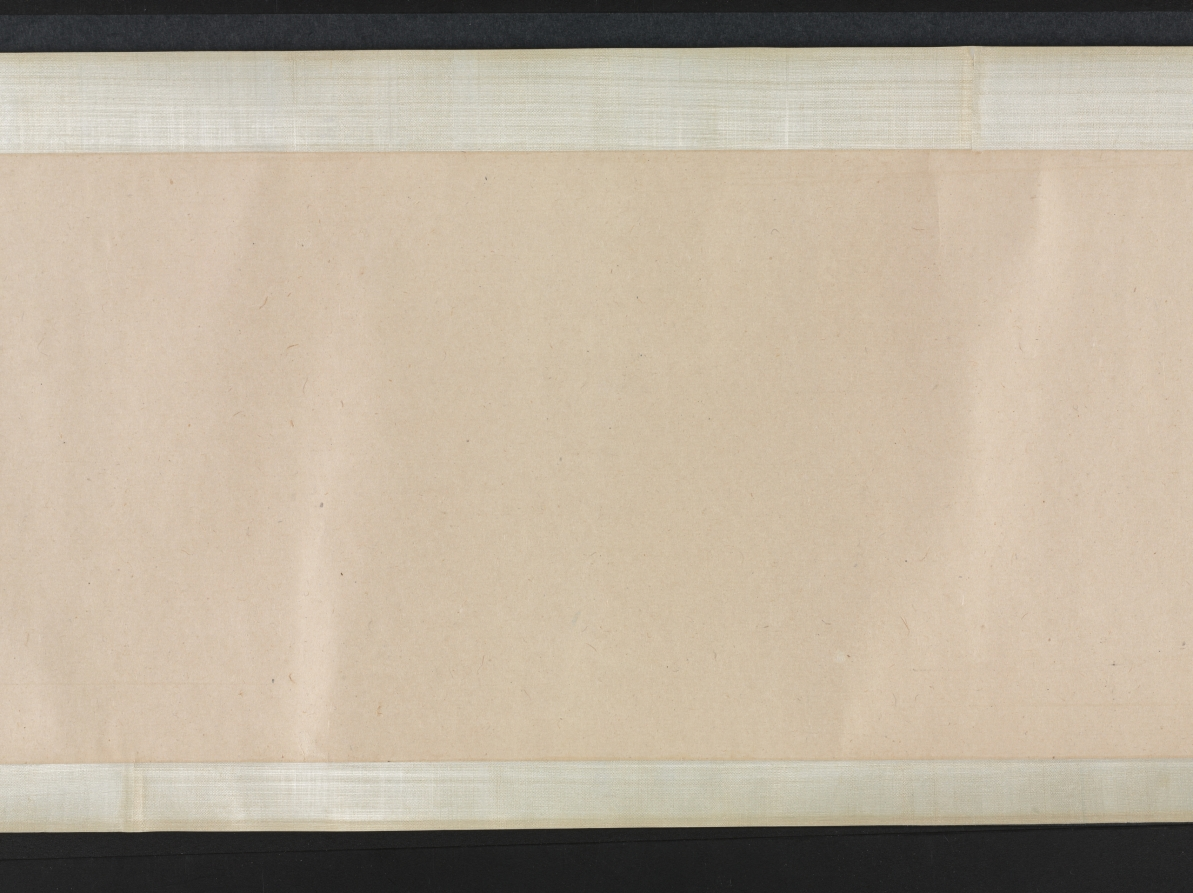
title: Saying Farewell at Xunyang (Song of the Pipa)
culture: China, Ming dynasty (1368–1644)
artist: Wen Boren (Chinese, 1502–1575)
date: 1500s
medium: handscroll, ink and color on paper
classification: Painting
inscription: "潯陽送客圖" 五峰山人文伯仁寫于停雲館中 [印] 文伯仁; 五峰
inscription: 2 colophons and 9 additional seals: 1 transcription of "Pipa xing 琵琶行” (Song of Pipa) and 3 seals of Zhu Yizun 朱彜尊 (1629-1709); 2 seals of Wu Rongguang 吳榮光 (1773-1843); 1 colophon, dated 1826, and 3 seals of Wu Xijia 吳錫嘉 (mid-1700s)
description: This handscroll depicts The Song of the Pipa, a poem by Bai Juyi 白居易 (772–846) written after the poet’s encounter with a pipa player on the Yangzi River. Expelled from her home city when her beauty and fame had faded, she played for the poet at night. Her musical performance and tragic life story resonated with Bai Juyi, who had just been demoted and exiled from life at court himself. The hazy, vast view and pale color tonalities of this painting illustrate these feelings of endless sadness, having lost one’s sense of purpose in life.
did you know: Wen Boren depicted the chilly autumn water with a fishnet pattern.